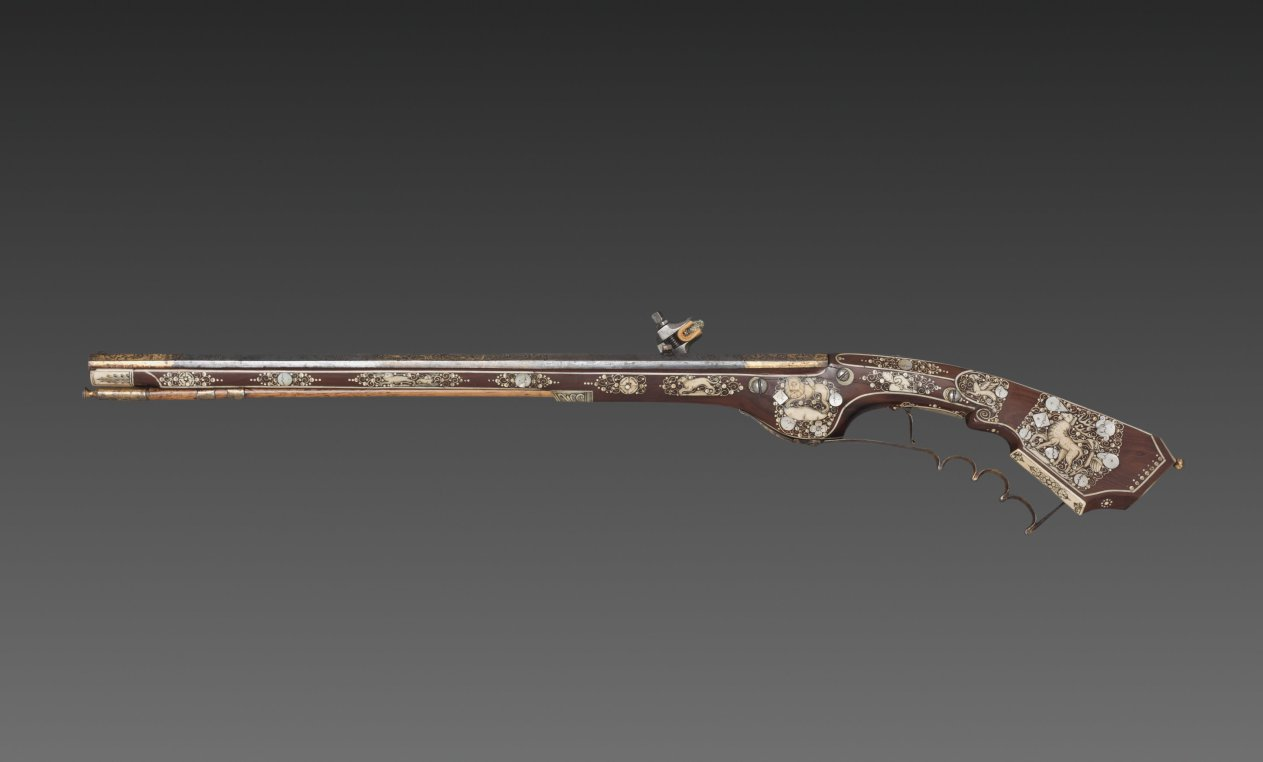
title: Wheel-lock Petronel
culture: Silesia (Southwestern Poland), Teschen, 17th century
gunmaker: Georg Kurland (Polish)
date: c. 1630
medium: steel, gilding, and wood inlaid with elk horn, ivory, and mother-of-pearl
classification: Arms and Armor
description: A petronel was a type of long pistol made with a wheel-lock ignition. Despite its length, the petronel was fired at the wrist like a pistol and not at the shoulder like a rifle. They were generally made in pairs during the early 1600s. Civilian versions were elaborately decorated for aristocratic clients.